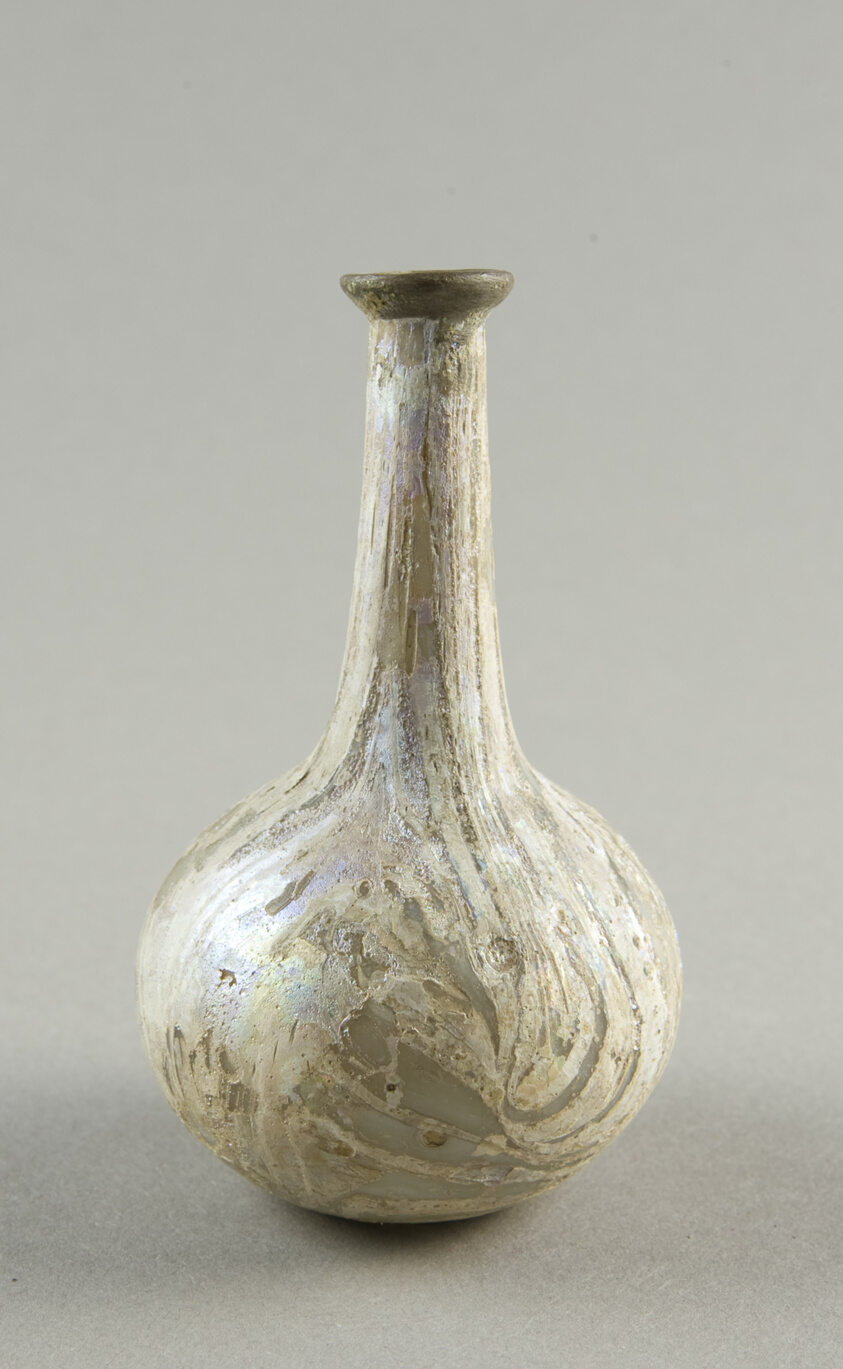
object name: Vessel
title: Bottle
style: syrian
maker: Roman; Levant or Syria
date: 1st century BCE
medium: Glass, blown technique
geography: Syria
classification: bottle; glass; vessel; ancient art